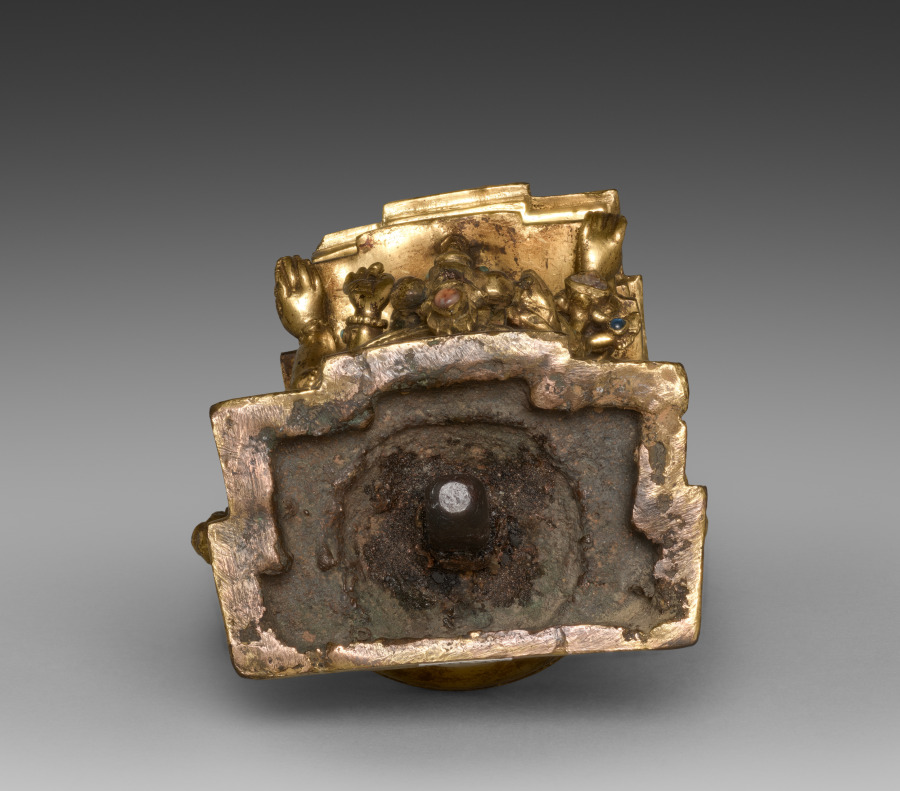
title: Support with Addorsed Figures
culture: Tibet, Densatil Monastery, 15th century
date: 1400s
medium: gilt bronze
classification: Sculpture